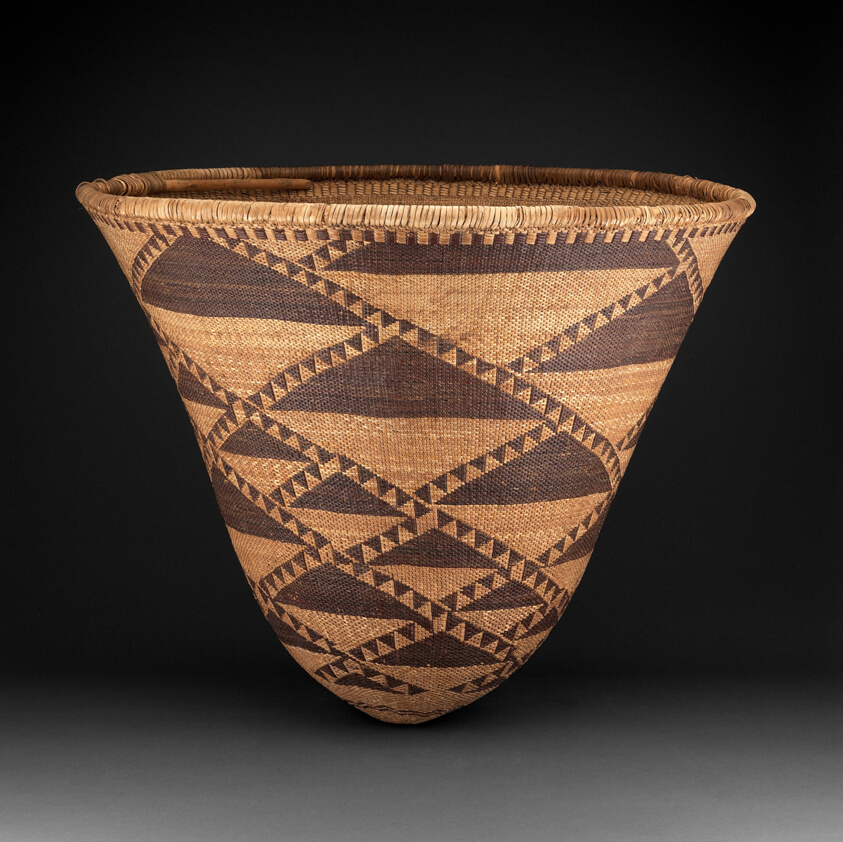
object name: Basketry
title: Burden Basket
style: pomo, native american, northern california, americas, Arts of the Americas, native north american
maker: Pomo (Northern California, United States)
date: 1870–80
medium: Plant fibers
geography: California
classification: basketry; vessel; fiber; wood; art of the americas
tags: basketry, baskets, diagonals, geometric